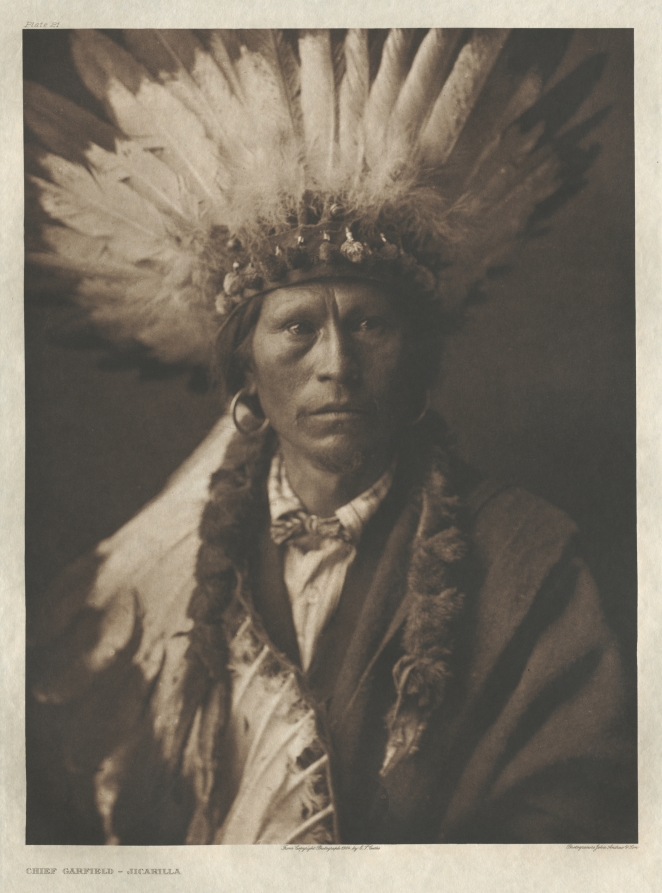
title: Portfolio I, Plate 21: Chief Garfield-Jicarilla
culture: America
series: The North American Indian: being a series of Portfolios picturing and describing the Indians of the United States, the Dominion of Canada, and Alaska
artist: Edward S. Curtis (American, 1868–1952)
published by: The University Press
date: 1904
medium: photogravure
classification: Portfolio